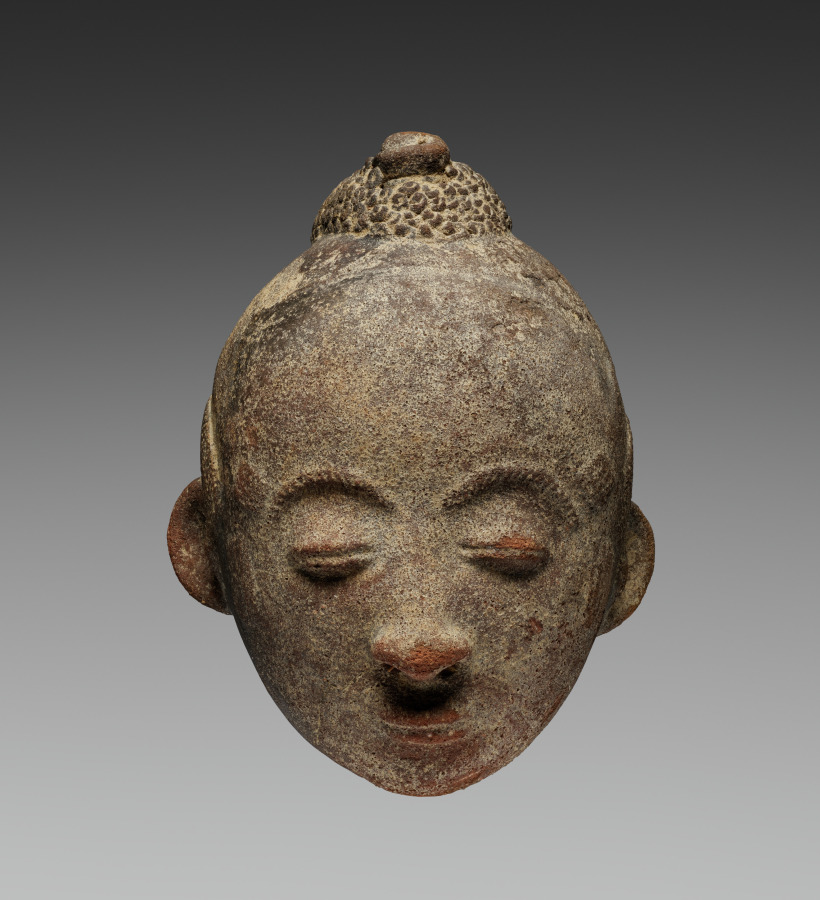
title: Memorial head (nsodie)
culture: Ghana, Akan-style sculpture, unknown female ceramicist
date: late 1600s–early 1700s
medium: Terracotta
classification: Sculpture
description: This is an idealized portrait of an Akan royal. The Akan states formed in West Africa around the 1400s. Akan royal family members commissioned terracotta portraits like this from female artists during someone’s life. Following their death and burial, the family placed these sculptures in a sacred grove. The woman who sculpted this head over 300 years ago worked from memory, without sketches. The resulting sculpture combined idealized physical qualities of elite figures with individual details. The hairstyle and skin color of this portrait reflect its subject’s individuality. In contrast, his calm expression reflects the desired “cool composure” of elites.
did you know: The woman who sculpted this head did so without making a sketch, working from her memory of the subject.